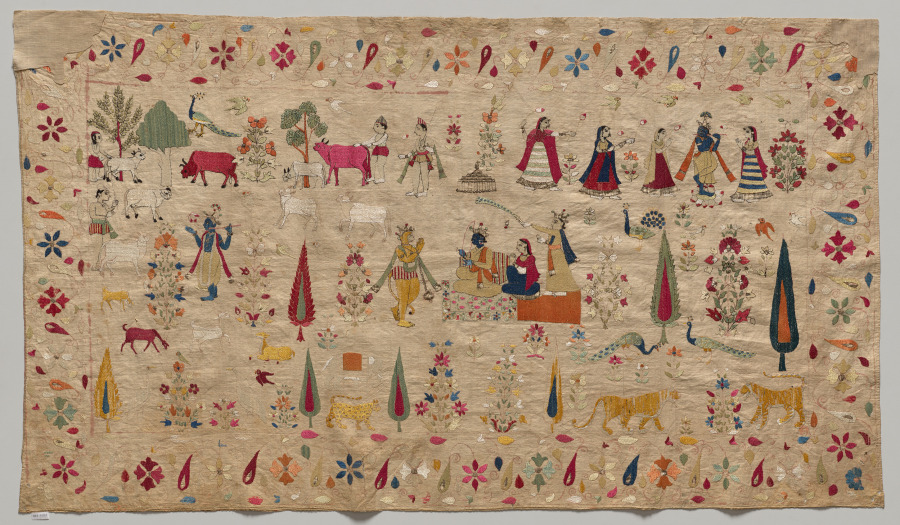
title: Rumal with Rama and Krishna scenes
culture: Northern India, Pahari Kingdom of Chamba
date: 1700s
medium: Silk and silver wire on cotton; embroidery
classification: Embroidery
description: Rumal refers to a double-sided embroidery technique perfected by women in the Pahari region of the northwest Himalayas. Unlike other forms of embroidery, no knots or loose strings are visible. Rumals were intended to look like paintings on cloth. An artist who was skilled in making Pahari paintings drew outlines of the composition with a brush on hand-loomed cotton muslin fabric and noted the colors to be used. Women then used a type of stitch called “double satin stitch” to create flat planes of color on both sides of the fabric. Girls were responsible for winding the silk threads into multistrand embroidery floss. Rumals were treasured as objects of wealth and given as gifts during weddings or state ceremonies. Many rumals depict subjects drawn from Hindu devotional literature. In the center, the semidivine monkey general Hanuman pays his respects to his lord Rama, Rama’s wife Sita, and Rama’s brother Lakshmana. Surrounding them above and to the right are bucolic rural scenes from the life of Krishna, another human incarnation of the god Vishnu. Krishna with his flute serenades the gopis (women of the cow herding community) and entertains his friends the cowherd boys (gopas). Flowering plants, vines, and wild animals populate the remaining space and borders. With such scenes, the painstaking act of double-sided embroidery becomes a devotional endeavor that generates religious merit.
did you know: Especially in the borders, some of the embroidery has fallen away, revealing the brushwork of the designer.